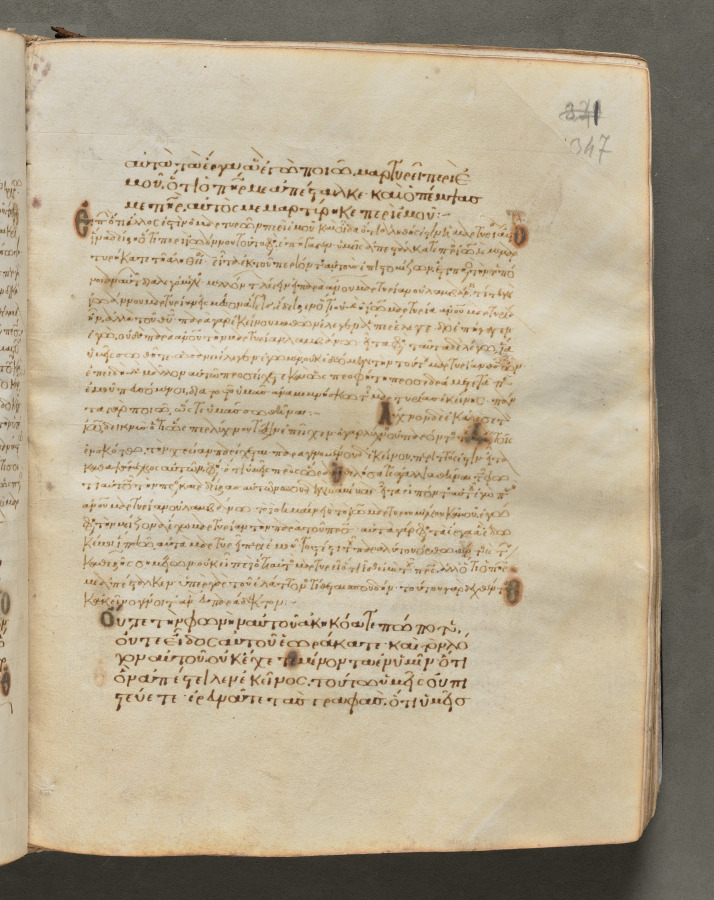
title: Text, folio 347 (recto), from a Gospel Book with Commentaries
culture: Byzantium, Constantinople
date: c. 1000–1100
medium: ink, tempera, and gold on vellum; leather binding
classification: Bound Volume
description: Each of the four gospels in this book opens on a page with brilliantly illuminated borders depicting the author of the text as well as birds—principally peacocks, symbols of the immortality of the soul—and fountains, representing the fountain of life and the salvation of the soul. This volume consists of 428 leaves with texts in Greek. Its level of sophistication suggests that it was probably written and decorated in a monastery in Constantinople.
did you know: Gospel books were carried in procession through Byzantine churches.